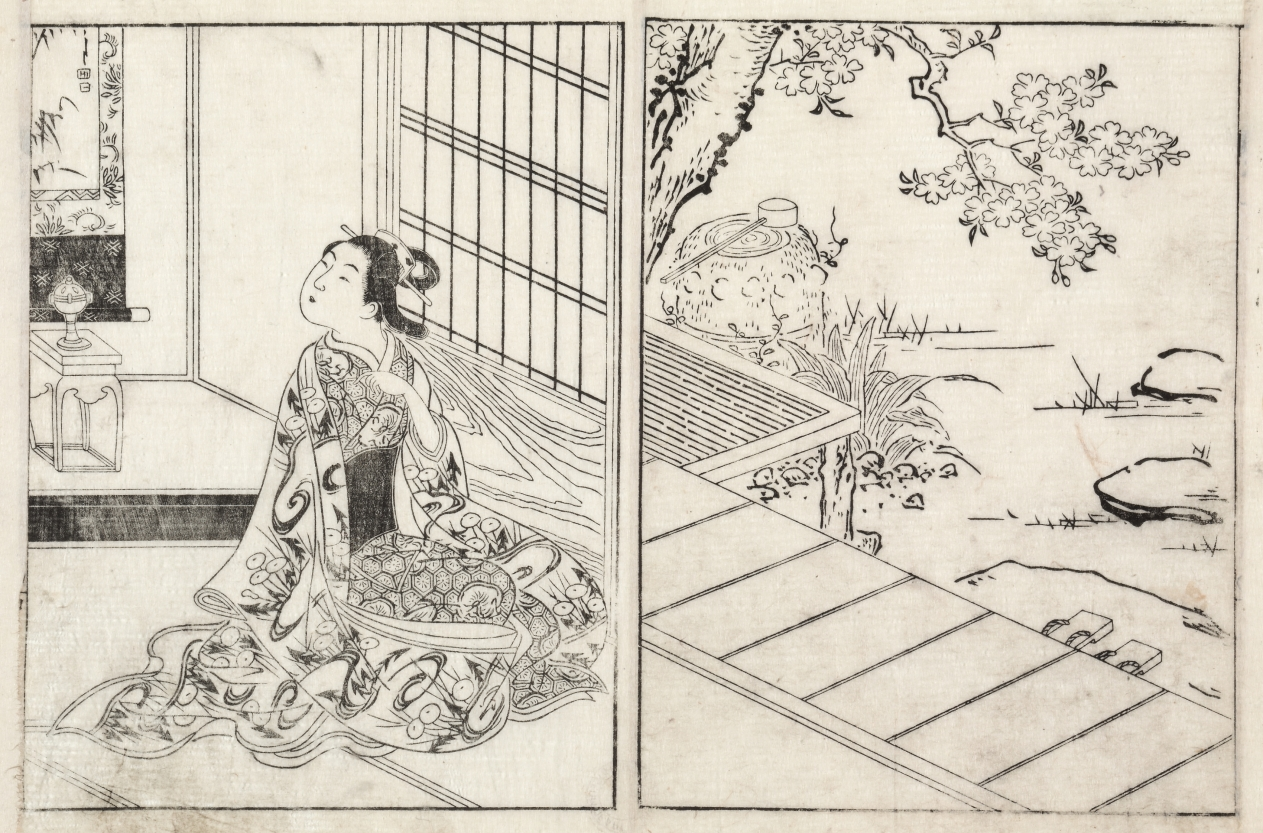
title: Woman Looking at a Hanging Scroll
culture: Japan, Edo period (1615–1868)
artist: Nishikawa Sukenobu (Japanese, 1671–1754)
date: c. 1740s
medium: color woodblock print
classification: Print